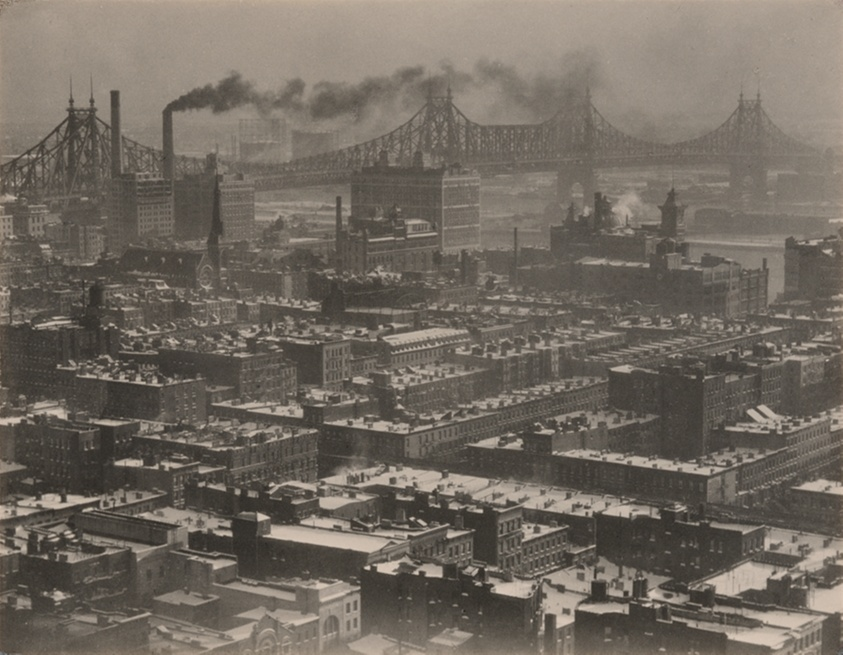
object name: Photograph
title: From Room "3003" - The Shelton, New York, Looking Northeast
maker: Alfred Stieglitz (American, 1864–1946)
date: 1927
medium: Gelatin silver print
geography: United States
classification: gelatin silver (developing-out-paper) pr; photographic process; photography; photograph